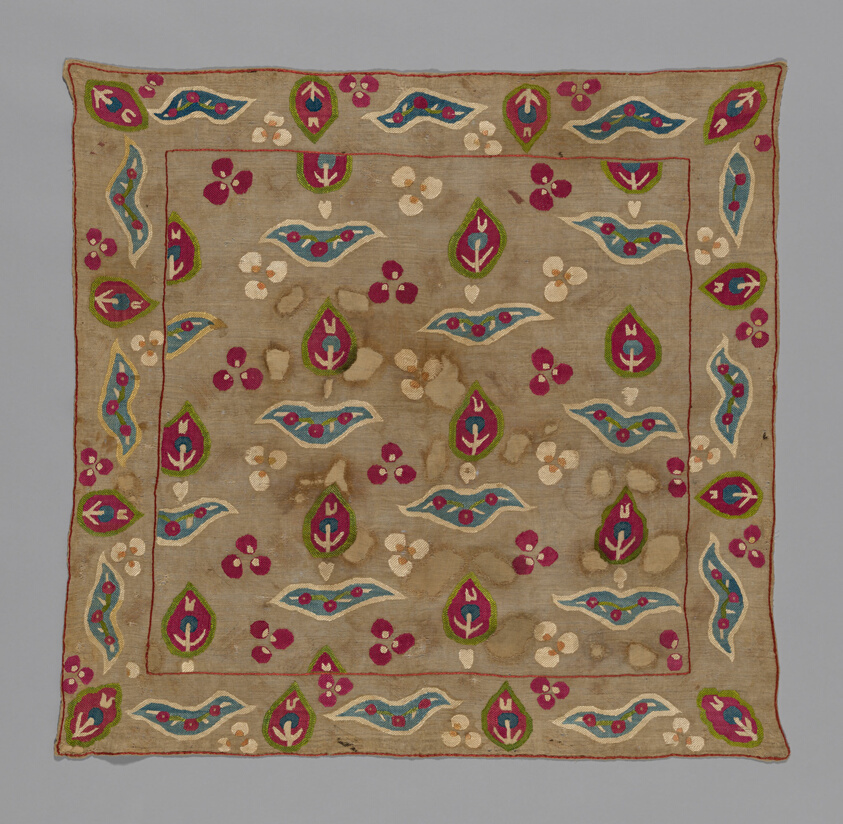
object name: Textile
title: Cover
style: turkish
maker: Turkey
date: 17th century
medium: Linen, plain weave; embroidered with silk floss in running and split stitches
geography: Turkey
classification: textile; weaving; needlework (visual works)